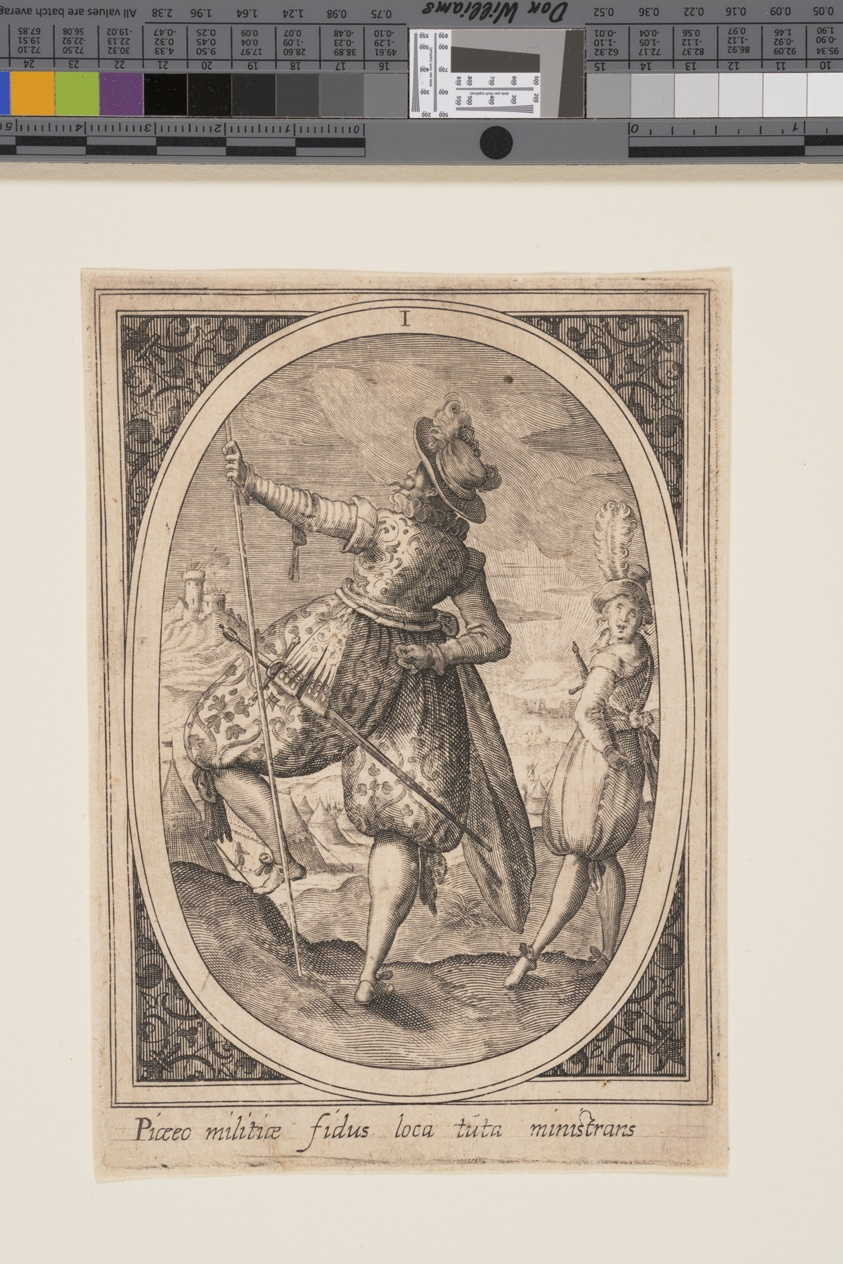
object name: Print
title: Plate 1 from Military Figures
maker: Attriuted to Heinrich Ulrich (German, c. 1572-1621); possibly after Paul Mair (German, active c. 1600)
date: c. 1590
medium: Engraving on ivory laid paper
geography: Germany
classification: engraving; paper; print; prints and drawing